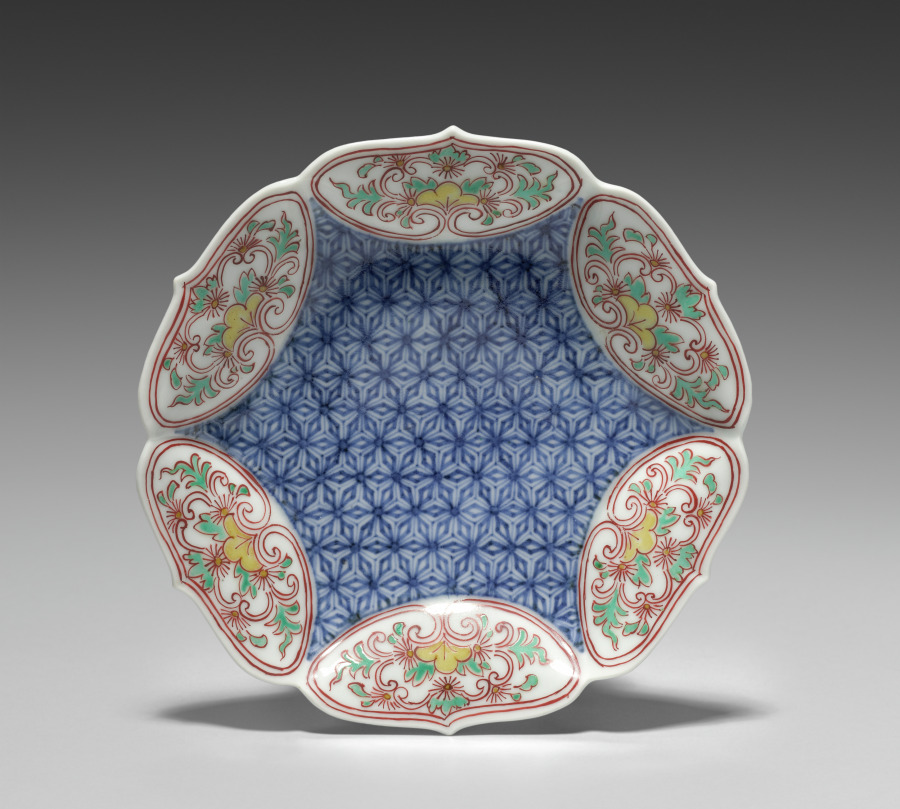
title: Small Dish (Kozara) with Hemp-Leaf Pattern and Bellflower Rim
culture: Japan, Edo period (1615–1868)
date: c. 1670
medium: Porcelain with underglaze blue and color enamel (Hizen ware, Nabeshima type)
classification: Ceramic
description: This dish combines underglaze blue decoration with overglaze color enamels. In between is a transparent glaze.